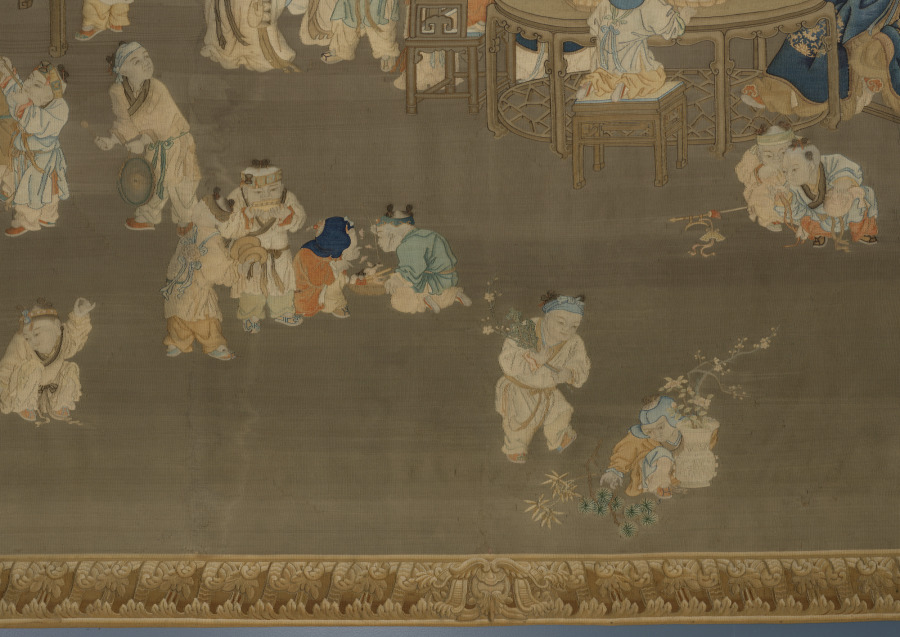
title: Family Gathering on New Year's Morning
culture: China, Qing dynasty (1644-1911)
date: late 1760s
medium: Silk and wool: tapestry weave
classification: Tapestry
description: This European-style tapestry depicts a family gathering, in a woven Western picture frame, that presumably once furnished the Hall of Cultivating the Mind (Yangxin dian) in the Forbidden City. The tapestry employs Western perspective and shading combined with the traditional Chinese subject of a family gathering in a palace, including motifs expressing wishes for good fortune and for a peaceful reign. In 1766, six French tapestries had been presented to the Chinese court. The Qianlong emperor was so intrigued that he commissioned tapestries in the French style from Suzhou. Records mention an imperial order for tapestries in the Western style, such as this one, in 1769, 1770, and 1775.